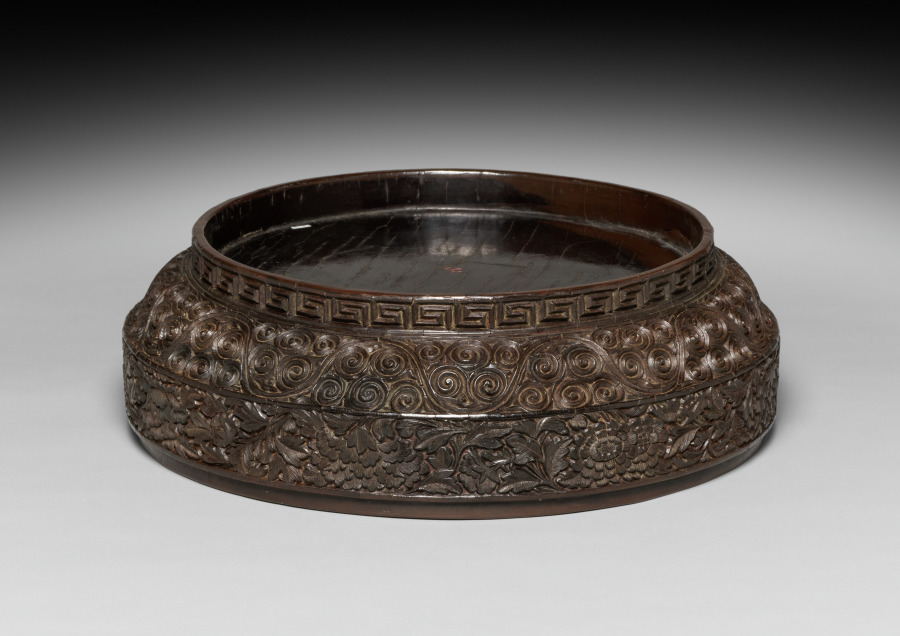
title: Round Box with Bird and Peonies Design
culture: China, late Southern Song (1127–1279) to early Yuan dynasty (1271–1368)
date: c. 1300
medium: carved lacquer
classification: Lacquer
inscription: 山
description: The carved lacquer box and lobed silver container nearby both feature pairs of birds and flowers on their covers. There is a striking similarity in decoration, shape, and aesthetic appeal. Both boxes suggest that successful designs and shapes circulated among craftsmen, workshops, and beyond regional borders.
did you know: To allow for the depth of carving, numerous layers of different colored lacquer were applied to a core of wood strengthened by a fabric covering impregnated with lacquer.